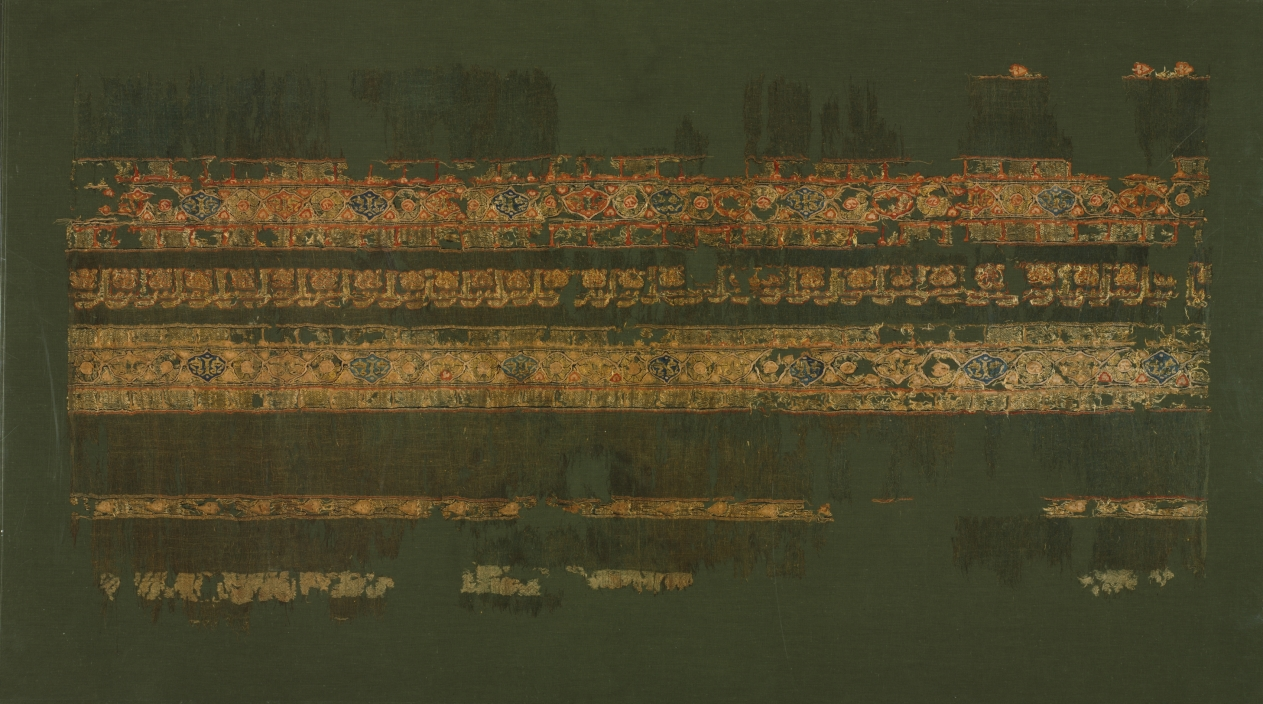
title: Tiraz with gold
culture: Egypt, Fatimid period, reign of Caliph al-Musta‘lī, 1094–1101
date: 1094–1101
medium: plain weave with inwoven tapestry weave: linen, silk, and gold filé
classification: Textile